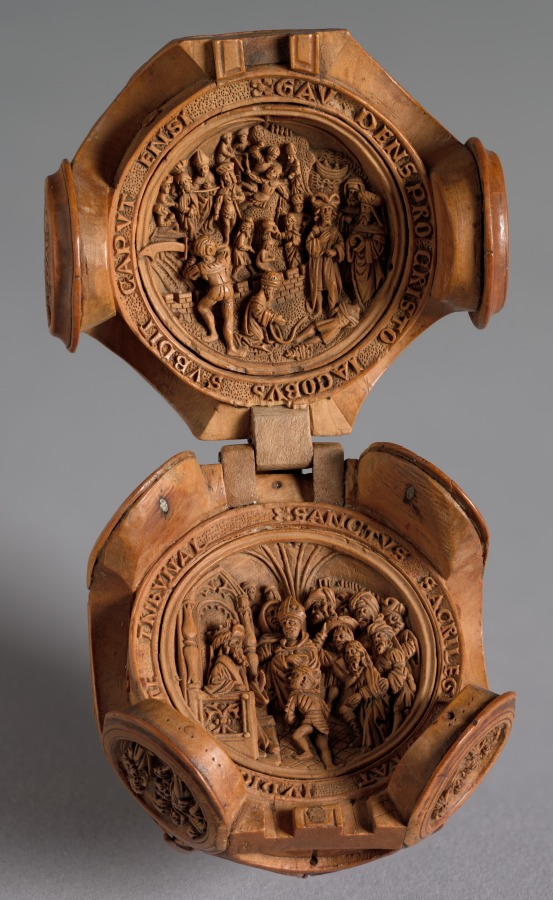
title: Prayer Nut with Scenes from the Life of St. James the Greater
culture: Northern Netherlands (Holland)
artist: Adam Dircksz (Netherlandish, active c. 1500)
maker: and Workshop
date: c. 1500–1530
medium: boxwood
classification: Sculpture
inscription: Interior around lower half: SANCTVS SACRILEGI STAT IVDICIS ANTE TRIBVNAL (Holiness stands before the throne of the profane judge)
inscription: Interior, around upper half: GAVDENS PRO CRISTO IACOBVS SVBDIT CAPVT ENSI (St James submits his head to the sword)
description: Prayer nuts are capsules that can be opened in half and were mainly worn from the end of the 1400s until 1530, particularly in the Netherlands. These objects are generally made from boxwood and carved with extreme refinement and delicacy. They often echo Gothic architecture and include openwork tracery or elaborate decorative patterns. Prayer nuts came into fashion for private devotion as a pendant on the rosary or on a decorative chain. The emergence of prayer nuts went hand in hand with the practice of praying the rosary more frequently at the end of the Middle Ages.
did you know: This miniature masterpiece was held and caressed within the palm of the holder as they prayed and meditated on their faith. What do you use to focus or engage in quiet concentration?